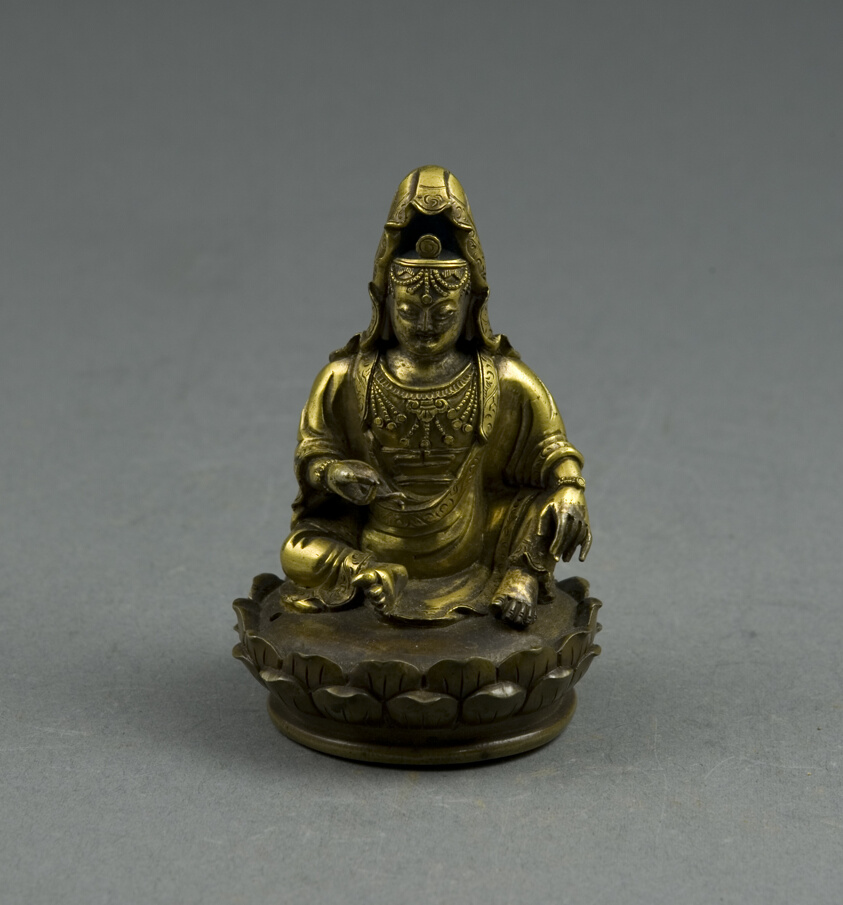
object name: Sculpture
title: Guanyin (Avalokitesvara) on lotus base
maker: China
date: Qing dynasty (1644-1911), 18th century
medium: Gilt bronze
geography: China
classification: bronze; metal; sculpture; asian art